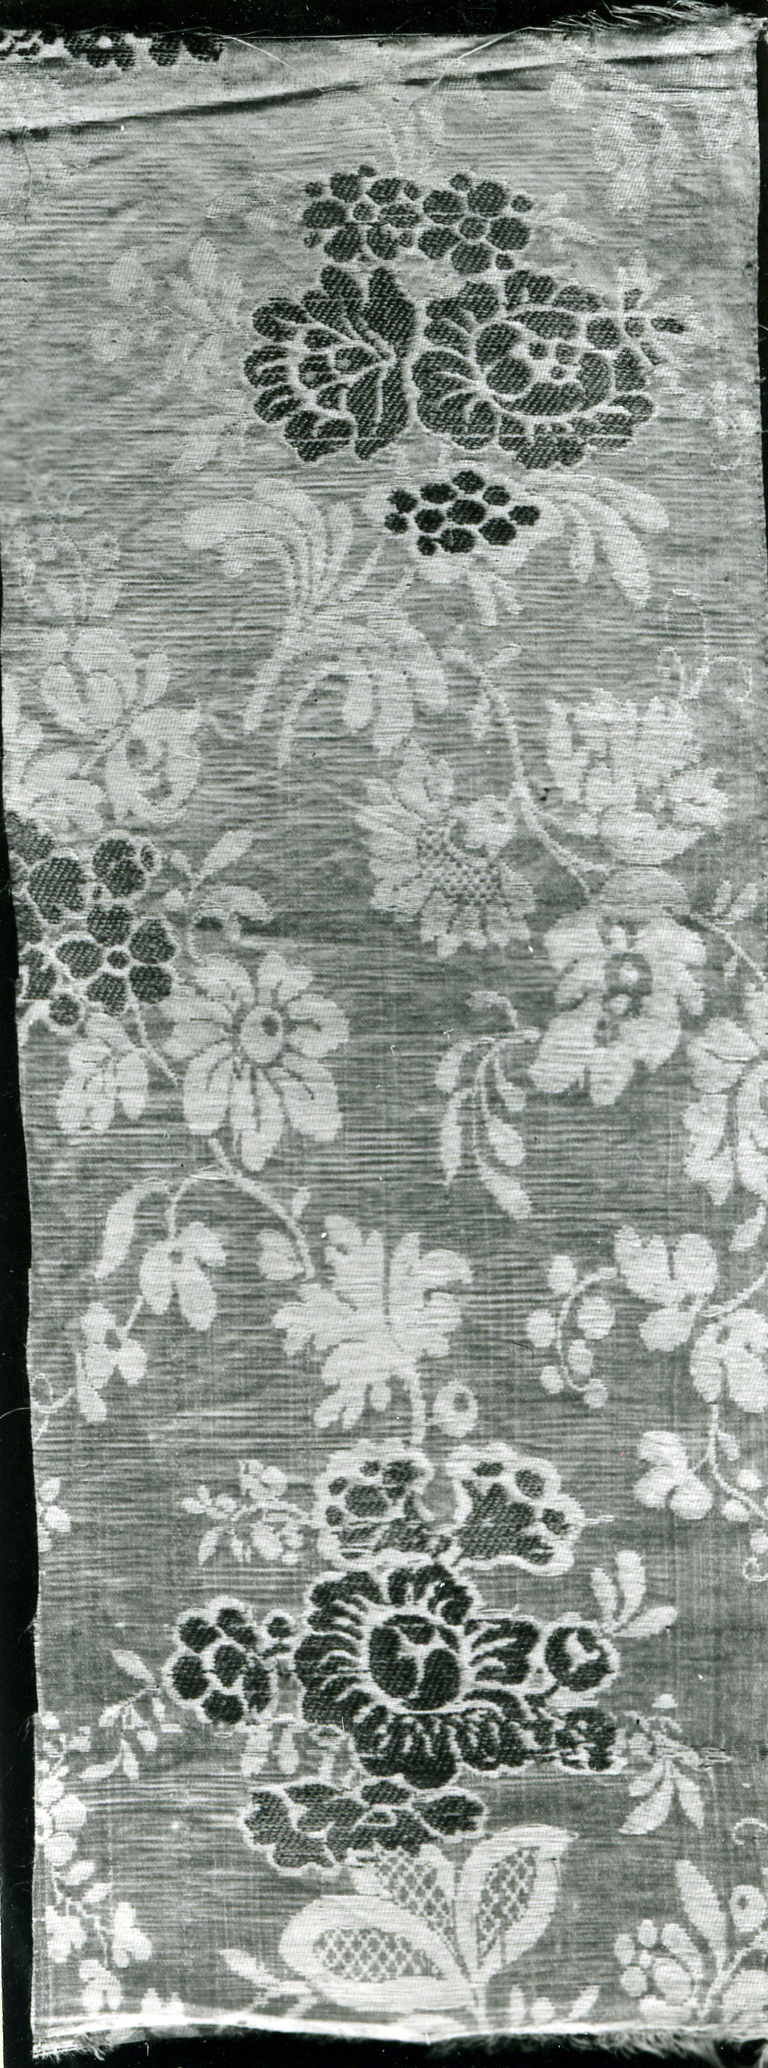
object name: Textile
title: Fragment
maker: France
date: 18th century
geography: France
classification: textile; weaving